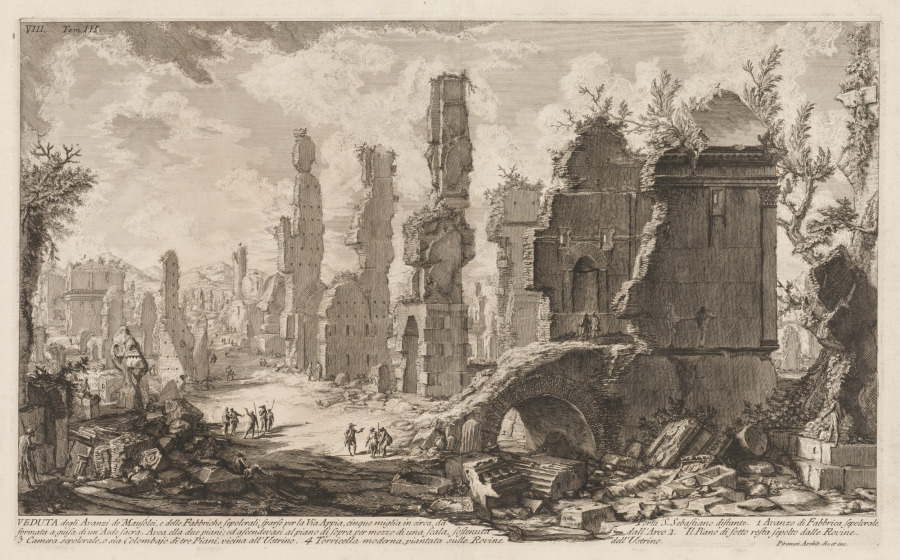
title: Antiquities of Rome: The Appian Way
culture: Italy, 18th century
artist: Giovanni Battista Piranesi (Italian, 1720–1778)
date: c. 1756–57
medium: etching and engraving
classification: Print